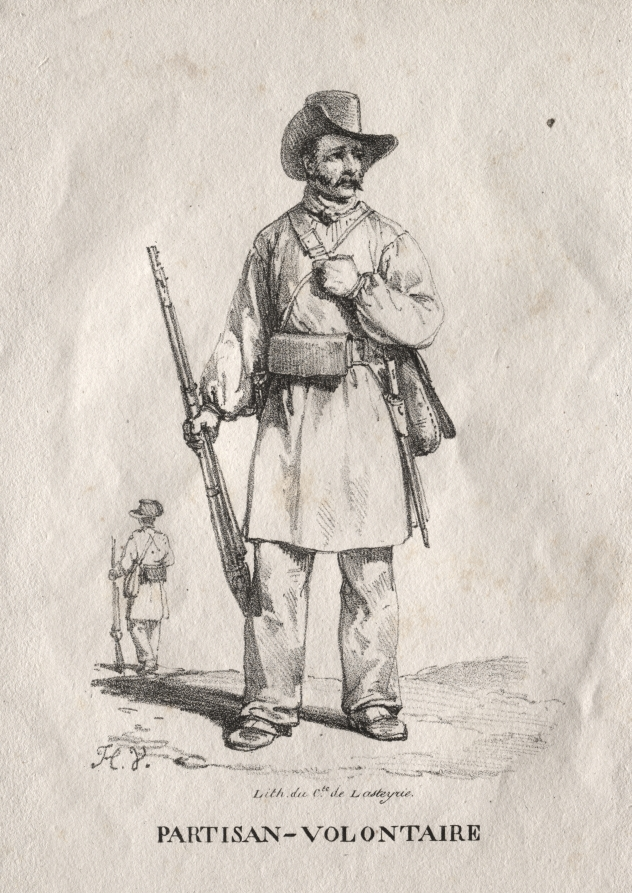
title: Voluntary Partisan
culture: France, 19th century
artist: Horace Vernet (French, 1789–1863)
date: 1822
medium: lithograph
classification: Print